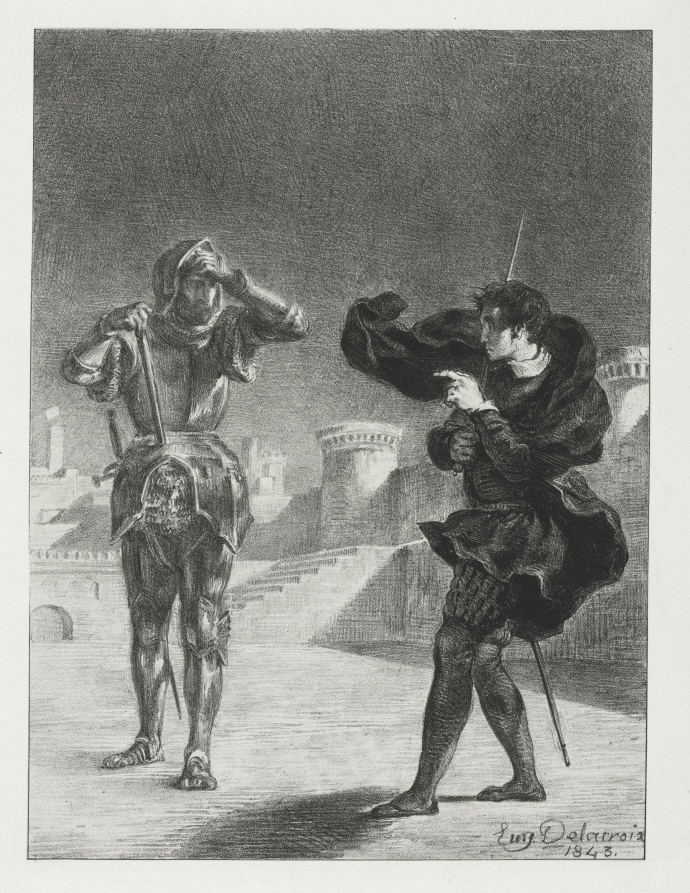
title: Hamlet: The Phantom on the Terrace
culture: France, 19th century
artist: Eugène Delacroix (French, 1798–1863)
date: 1843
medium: lithograph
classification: Print